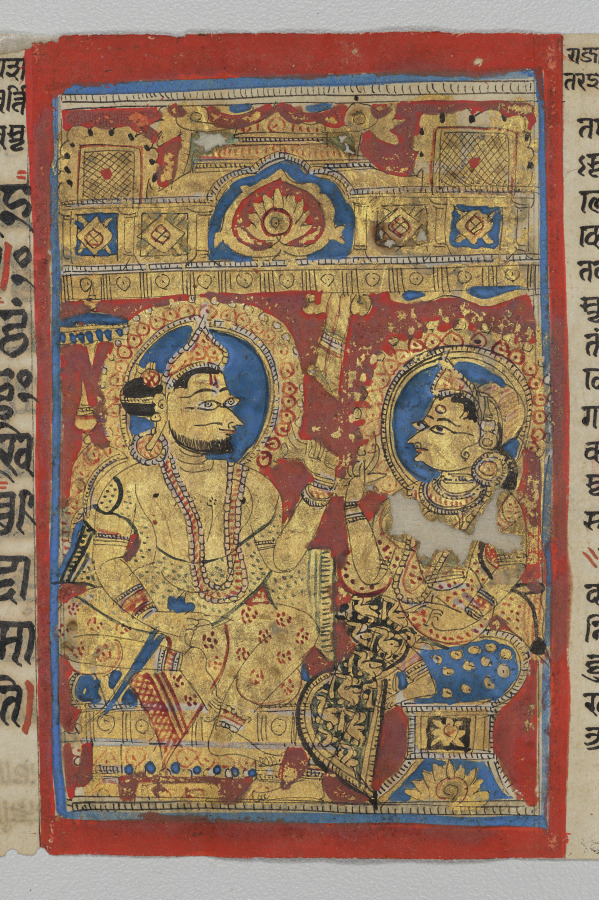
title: King Siddhartha and Queen Trishala Sit Alone to Discuss Her Dreams, Folio 24 (recto), from a Kalpa-sutra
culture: Western India, Gujarat, last quarter of the 15th century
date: c. 1475–1500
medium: Gum tempera, ink, and gold on paper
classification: Painting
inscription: [[upper right]] rājārāṇī parīyaviyāntarai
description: King Siddhartha is depicted on this page with his wife, Trishala, who had a series of auspicious dreams associated with her pregnancy. Her child Mahavira would grow up to become the historical founder of the Jain religion in the 500s BC. The royal couple is resplendently enthroned and bedecked in jewelry. Queen Trishala’s bodice was painted with a green pigment made from copper and vinegar; its high acid content caused the paper itself to disintegrate. The lavish use of gold and lapis lazuli indicates that it was a costly production.